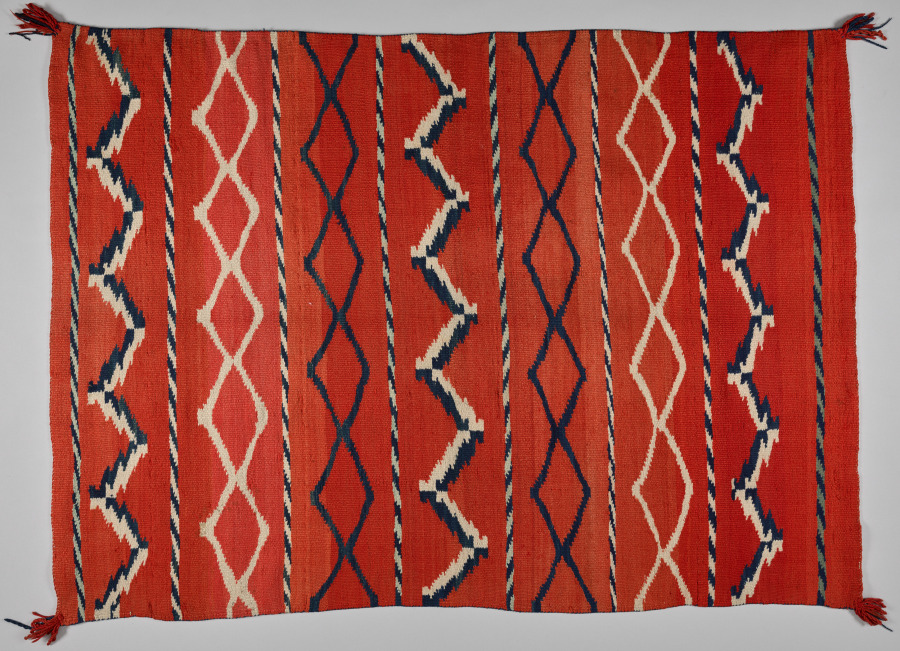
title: Wearing Blanket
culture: Native North American, Southwest, Navajo (Dine), woman artist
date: late 1800s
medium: Wool (handspun): tapestry weave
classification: Textile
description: Diné (Navajo) artists wove geometric designs that reference the natural environment as well as embody spiritual insights and meanings. Specific patterns were inherited but also evolved over time. This blanket was created during the late 1800s, when weavers in the Southwest began to shift from making garments for Indigenous use, including trade, to additionally create items for non-Native collectors. In this new market, traditional wearing blankets, which were worn around the shoulders, were purchased as rugs.